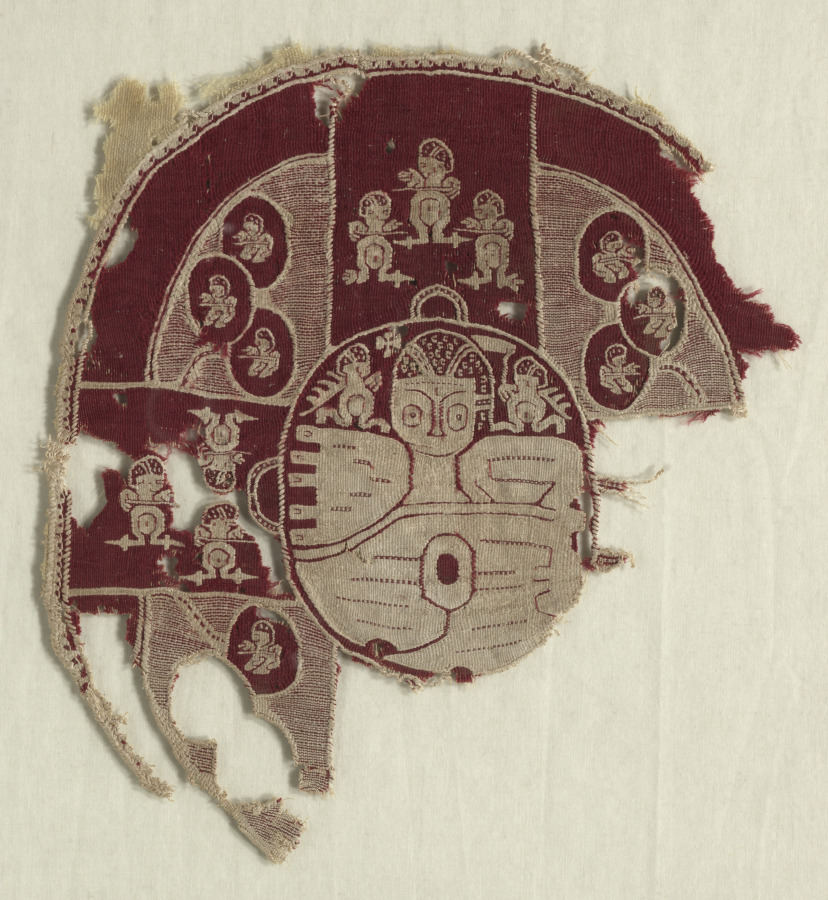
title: Tunic or Shawl Ornament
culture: Egypt, Byzantine period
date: 600s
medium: dyed wool, undyed linen; plain weave, slit-tapestry weave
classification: Textile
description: This oval originally belonged to a matched set that would have decorated either a unisex tunic or shawl. The fragment features a distinctive semi-abstract style of figural representation.